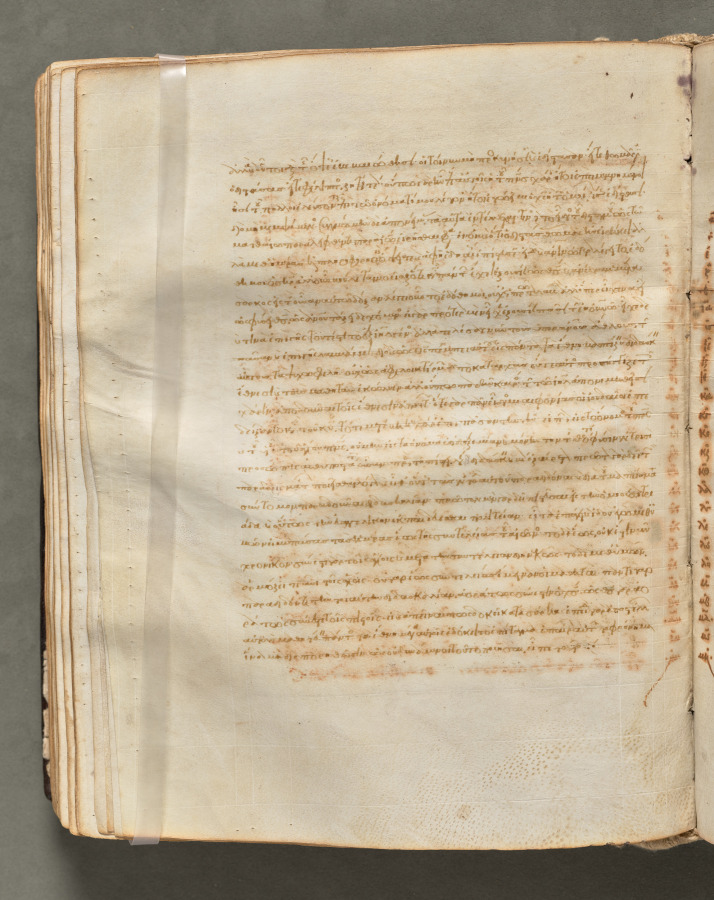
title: Text, folio 130 (verso), from a Gospel Book with Commentaries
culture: Byzantium, Constantinople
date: c. 1000–1100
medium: ink, tempera, and gold on vellum; leather binding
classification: Bound Volume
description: Each of the four gospels in this book opens on a page with brilliantly illuminated borders depicting the author of the text as well as birds-principally peacocks, symbols of the immortality of the soul-and fountains, representing the fountain of life and the salvation of the soul. This volume consists of 428 leaves with texts in Greek. Its level of sophistication suggests that it was probably written and decorated in a monastery in Constantinople.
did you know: Gospel Books were carried in procession through Byzantine churches.